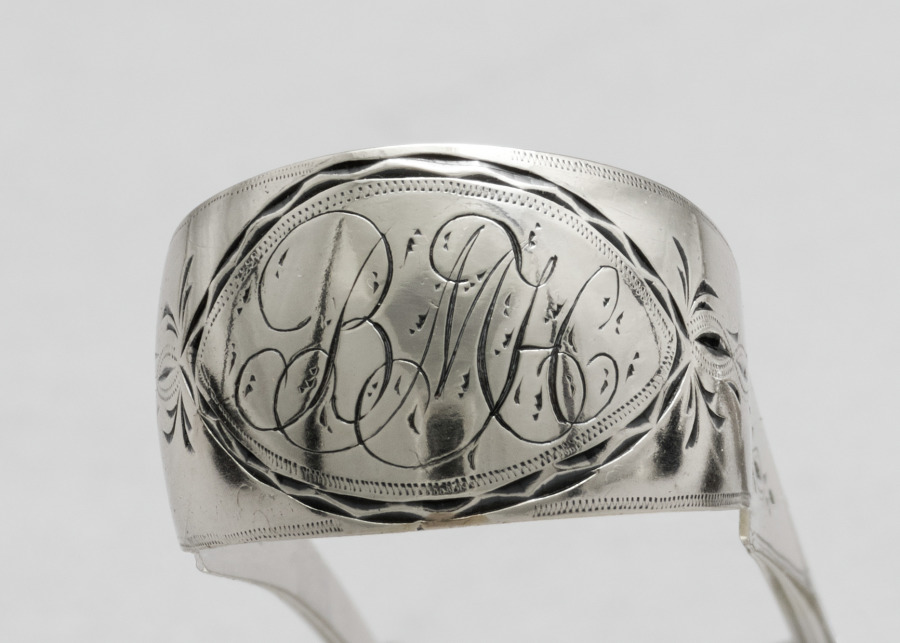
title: Sugar Tongs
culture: America, New York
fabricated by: John Sayre (American, 1771–1852)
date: c. 1800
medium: silver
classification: Silver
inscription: engraved "BMH" in bright-cut script within reserve on bow.